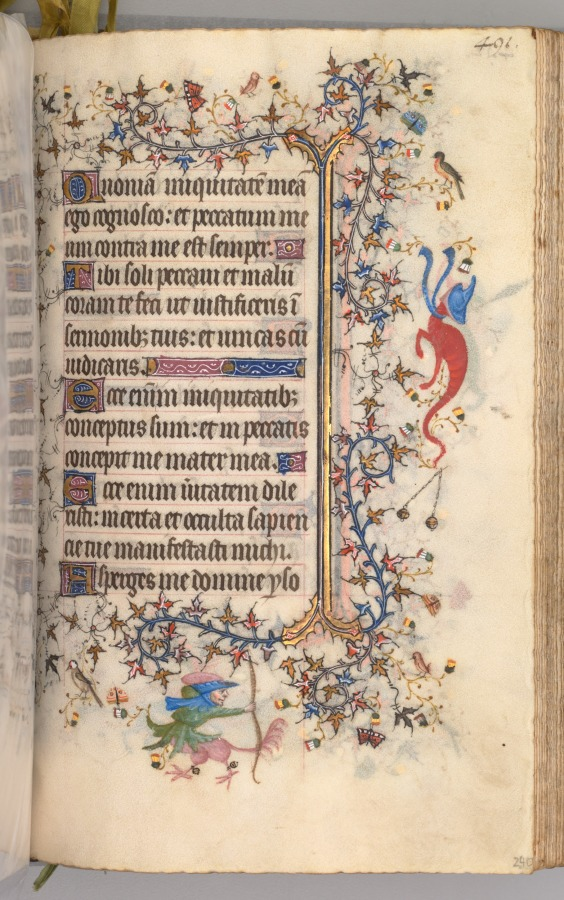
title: Hours of Charles the Noble, King of Navarre (1361-1425): fol. 240r, Text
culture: France, Paris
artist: Master of the Brussels Initials and Associates (French)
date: c. 1405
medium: ink, tempera, and gold on vellum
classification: Bound Volume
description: This precious volume was obviously highly prized by its owner, the French-born King of Navarre, who had his coat of arms painted on no less than twenty folios. Rather than directly commissioning this manuscript from a specific workshop, it seems that Charles the Noble acquired his book of hours -- perhaps ready-made for the luxury market -- while on a trip to Paris in 1404-05. A collaborative effort, six painting styles are evidenced within the pages of this codex, those of two Italians, two Frenchmen, and two Netherlanders. The painter who was responsible for the planning and decoration of the book, and who produced seventeen of the large miniatures, was a Bolognese artist known as the Master of the Brussels Initials. His principal assistant, responsible for most of the borders, was a Florentine who signed his name "Zecho" da Firenze on folio 208 verso.